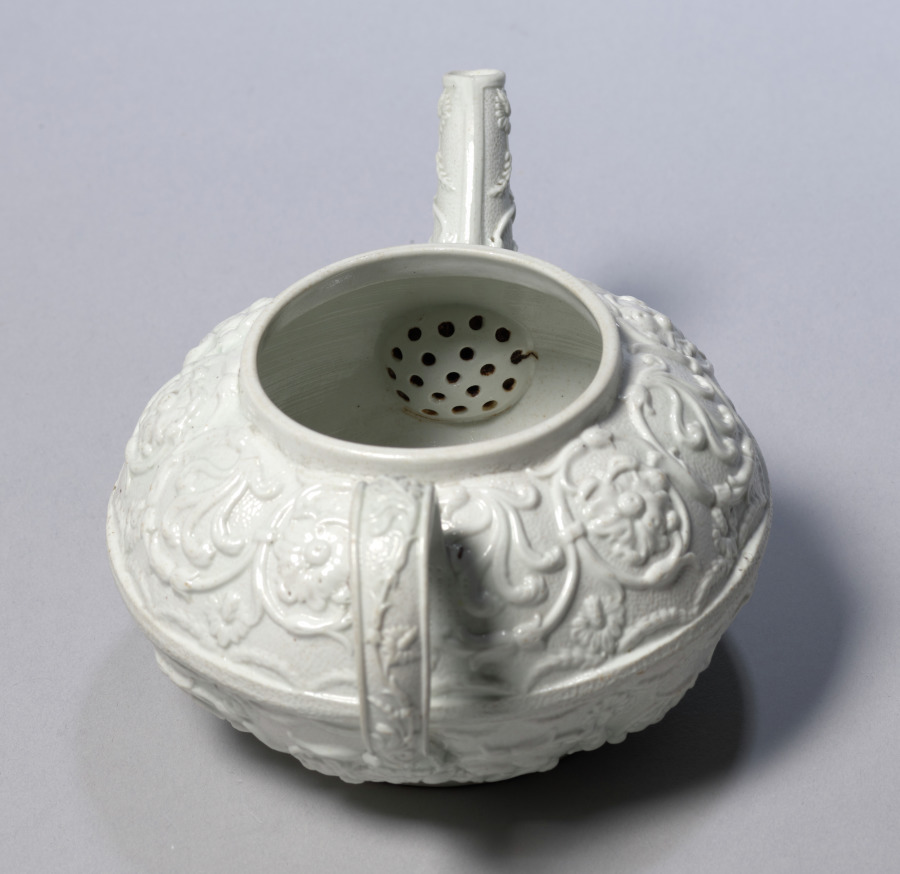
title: Teapot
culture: England, Staffordshire, 19th century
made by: Wedgwood Factory (British)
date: c. 1830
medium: stoneware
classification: Ceramic